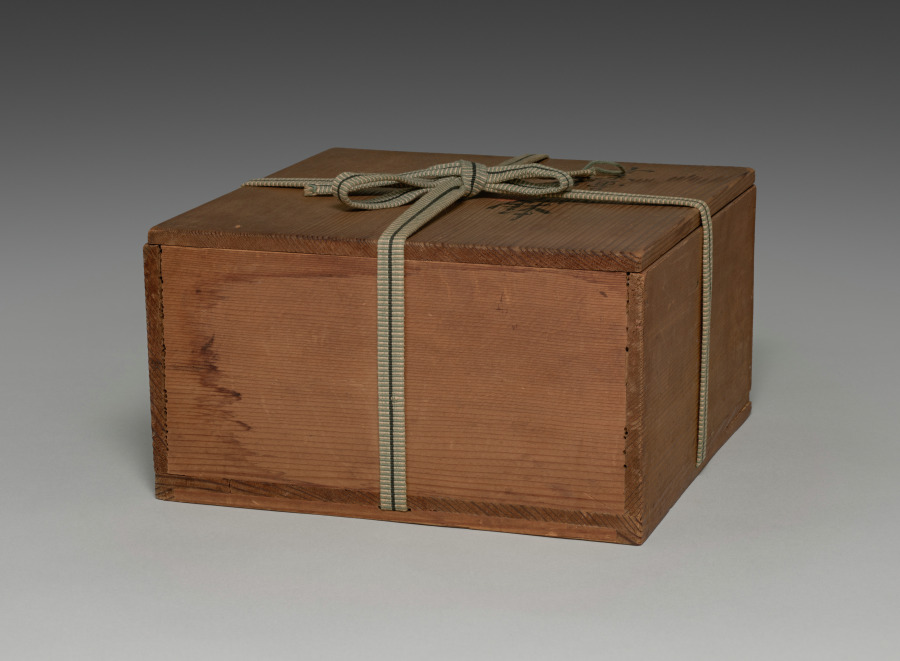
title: Bowl with Auspicious Ideographs and Floral Motifs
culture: China, Ming dynasty (1368–1644)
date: 1600s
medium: Stoneware with overglaze color enamels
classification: Ceramic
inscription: 長,命,富,貴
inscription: 【印】清風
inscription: 【印】大日本清風造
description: As part of their work, members of the Seifu studio, and Seifū Yohei III (三代清風与平, Japanese, 1851–1914), in particular, engaged in the viewing and appreciation of Chinese ceramics. While they were not authenticators, they would have been familiar with imported examples of Chinese stoneware and porcelain through tea gatherings, meetings with their elite clients, exhibitions, and other opportunities to see and study actual pieces from the mainland. This object and its box may be a reflection of Yohei III’s experiences of this kind. The bowl itself is slightly misshapen and roughly glazed with overglaze color enamels in red and green. Flanked by floral motifs, four Chinese characters brushed in red appear in roundels: 長命富貴. Meaning, respectively, longevity, life, prosperity, and status, they are pronounced together in Japanese as the phrase chōmeifūki, or “live long and prosper.” Additional loosely painted foliate designs in red and green circle the area above the foot and inside of the bowl. It is a relatively simple piece made by someone who was likely capable of much finer, more precise work but who could also do completely passable wares on short order. Of greater interest is the storage box lid for this piece. It has an inscription by Yohei III, with his seal, declaring it to be a “sweets dish from southern China with color images.” On the reverse of the lid, Yohei has written his name and placed his Imperial Household Artist seal, but instead of writing “made by,” he wrote “saw this [ceramic].” To the left of this is another inscription in a different hand, stating that the piece is a work from southern China with red-painted designs, produced at the very end of the Ming dynasty. It is signed “Kushi Takushin 久志卓真," along with his seal. Kushi Takushin (1898–1973) was a Japanese musician and music critic, as well as an antiques researcher and authenticator. He was especially interested in Ming dynasty Chinese ceramics and wrote extensively on Chinese, Japanese, and Korean ceramics. Originally from Hokkaido, he was active in Kyoto and began collecting art at a young age. Both he and Yohei appreciated and commented upon the bowl, and perhaps they both owned it.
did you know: Each roundel contains an auspicious word conveying good wishes for a long life and wealth.